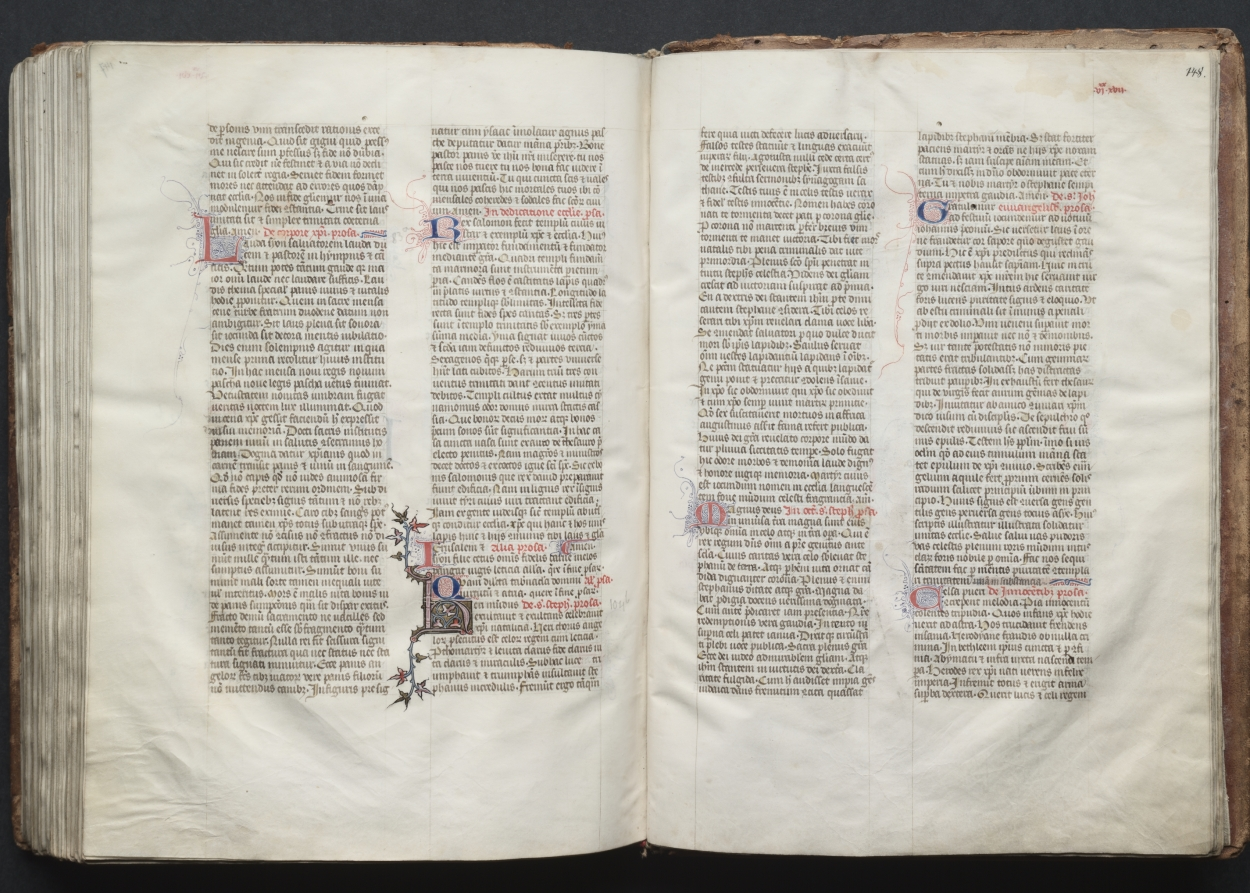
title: The Gotha Missal: Fol. 148r, Text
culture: France, Paris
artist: Master of the Boqueteaux (French)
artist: and Workshop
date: c. 1375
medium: ink, tempera, and gold on vellum; blind-tooled leather binding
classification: Bound Volume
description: The style and quality of this manuscript's decoration is typical of deluxe Parisian books made for aristocratic or royal patrons. Most of the book's decoration appears to be the work of the Master of the Boqueteaux, an artist active at the court of King Charles V (died 1380). His style was apparently shared by a number of book illuminators working in and around Paris. It is very possible that the Gotha Missal belonged to Charles V, but is not provable because the manuscript has no royal portraits and lacks a colophon. Given the book's magnificent decoration, however, it would seem that it was produced for a Valois prince, if not for the king himself. The manuscript receives its name from the German dukes of Gotha, its later owners.